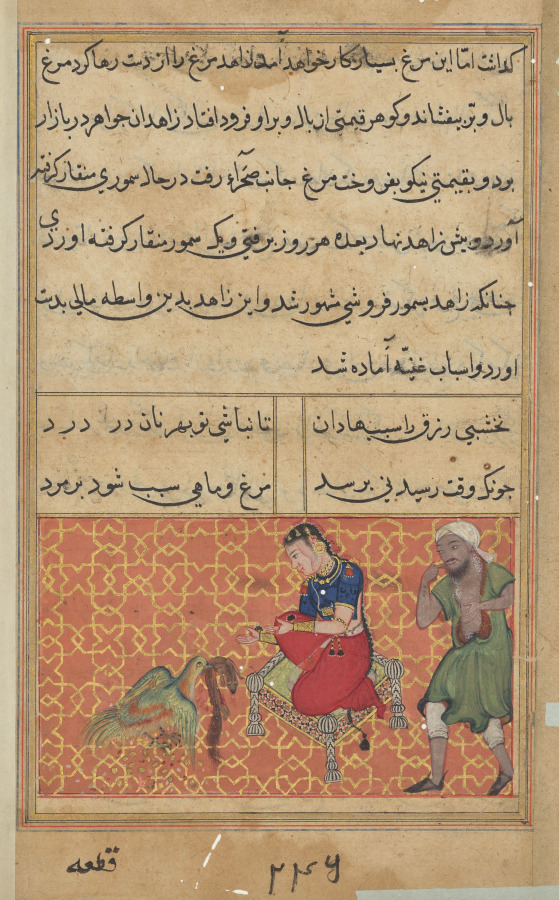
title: The bird of seven colors brings a sable to the pious man, from a Tuti-nama (Tales of a Parrot): Fifty-second Night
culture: Mughal India, court of Akbar (reigned 1556–1605)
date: c. 1560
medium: gum tempera, ink, and gold on paper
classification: Painting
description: The pious man and his wife stare at the fantastic seven-colored bird in surprise. Although it cost the man his final diram, the bird becomes a source of great wealth and prosperity for his family. Every day it leaves and returns with a sable, which the man sells in the market. Soon the man becomes a well-known merchant.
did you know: Several red and yellow gemstones, which fell from the bird’s feathers, rest on the ground at its feet.